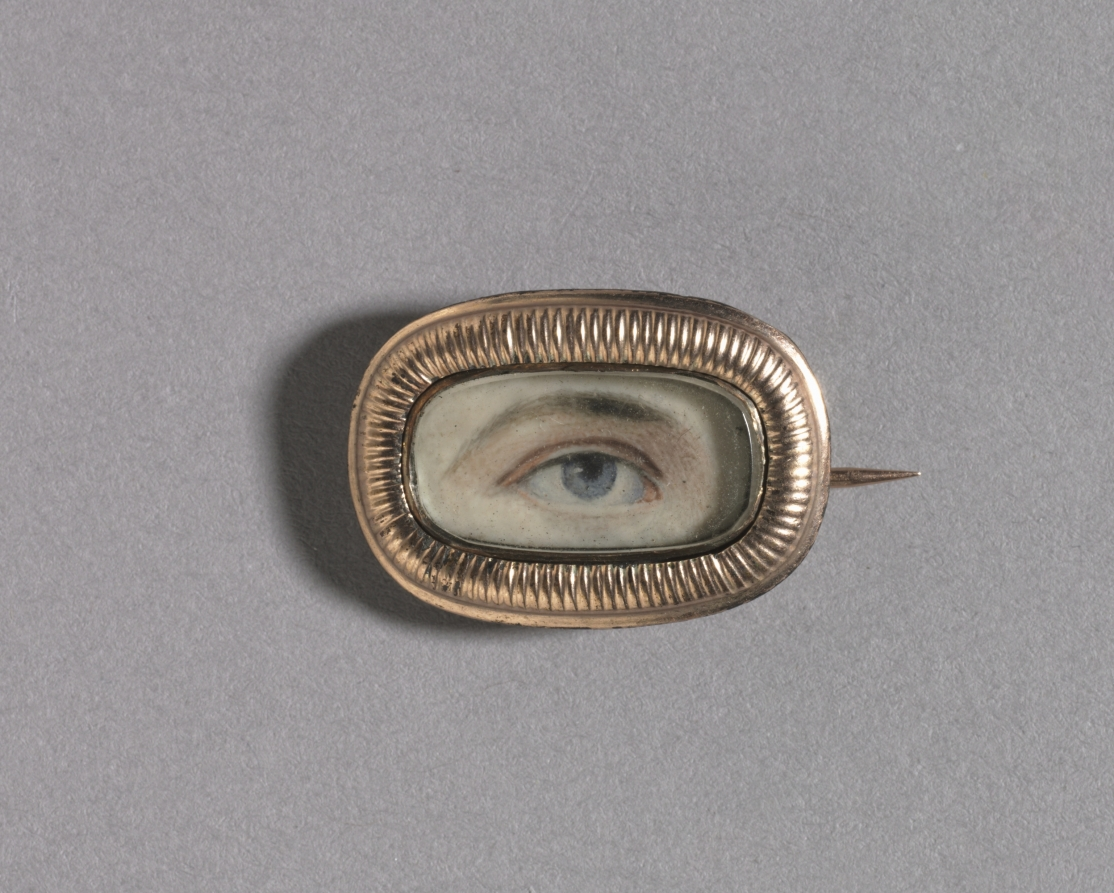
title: Eye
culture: America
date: 1900s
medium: watercolor on ivory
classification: Portrait Miniature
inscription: small inscription on verso: "E103 c51(?)"